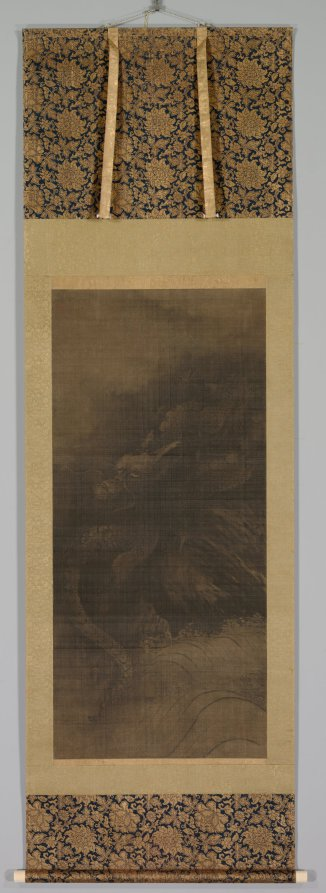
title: Dragon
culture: China, Southern Song dynasty (1127-1279)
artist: Fachang Muqi (Chinese, 1220–1280)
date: c. 1250–79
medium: Hanging scroll; ink on silk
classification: Painting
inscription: 道有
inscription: 雜華室印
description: The dragon and tiger are tied to the philosophical concept of yin and yang, which describes opposite but complementary forces. The dragon occupies a tiered background of waves and mist. Its luminous head emerges from the darker passages, and its narrow twisting body is serpent-like. By contrast, the close-up view of the tiger emphasizes its bulk. The tiger bends its head to lick its paw while its tail curls in the foreground. In their original Chan Buddhist context, this pair of scrolls likely flanked a central image, like the Bodhisattva Guanyin. The silk has darkened over the centuries, and the slight reddish shading in the tiger’s tongue and nose has faded.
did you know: Fachang Muqi was a Chinese Chan Buddhist monk and painter.